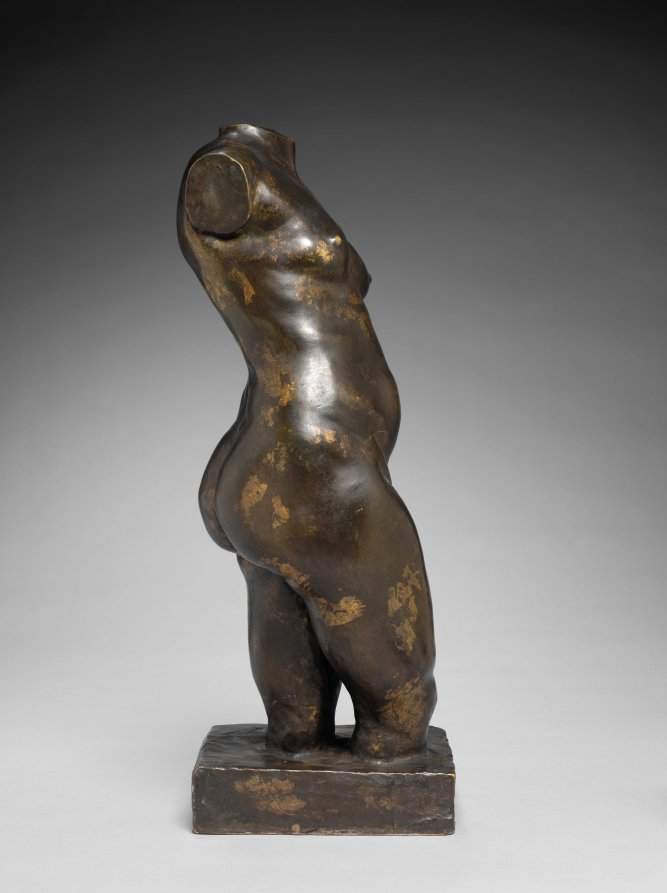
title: Torso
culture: France, 19th century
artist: Jules Dalou (French, 1838–1902)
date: c. 1850 – 1899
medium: bronze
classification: Sculpture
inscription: Signed: "J. Dalou"; "Susse Fres. Ed[ts] Paris"